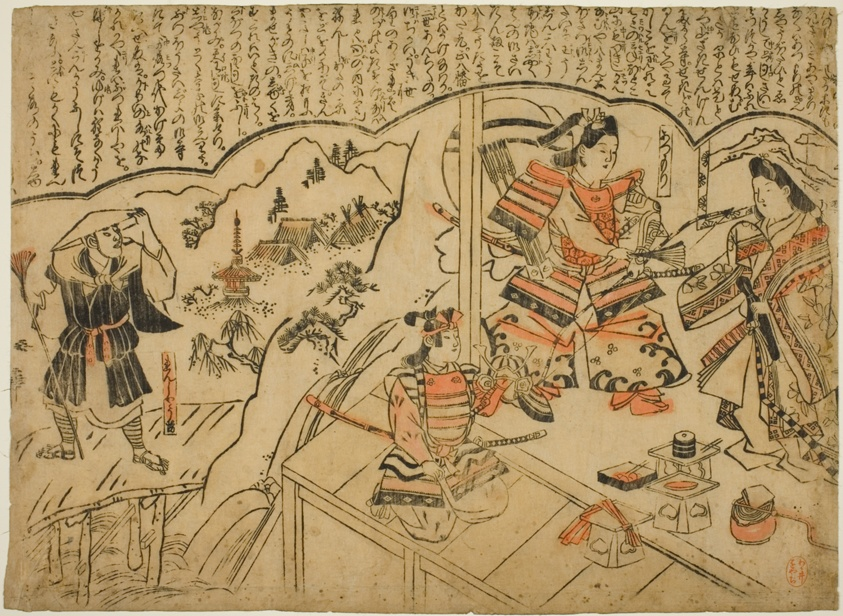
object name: Print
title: The Vision of Kumagai Renshobo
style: Japanese (culture or style)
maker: Attributed to Sugimura Jihei; Japanese, active c. 1681-98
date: c. 1690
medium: Hand-colored woodblock print; oban, tan-e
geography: Japan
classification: woodblock print; print; asian art